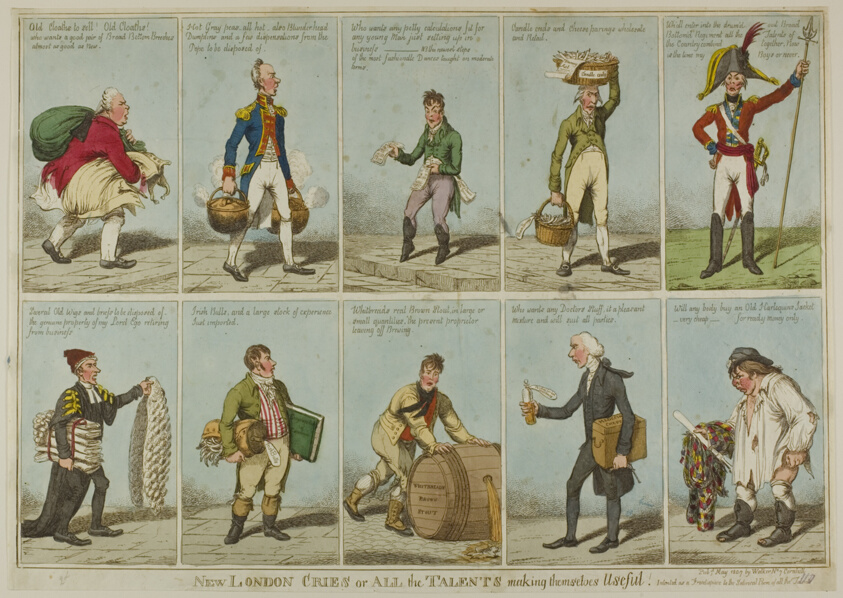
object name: Print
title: New London cries or all the talents making themselves useful!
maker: Unknown Artist (English, late 18th century); Published by Walker (English, active 1789-1813)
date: published May 1807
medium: Etching in black, with hand-colored additions, on cream wove paper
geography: England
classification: etching; print; prints and drawing